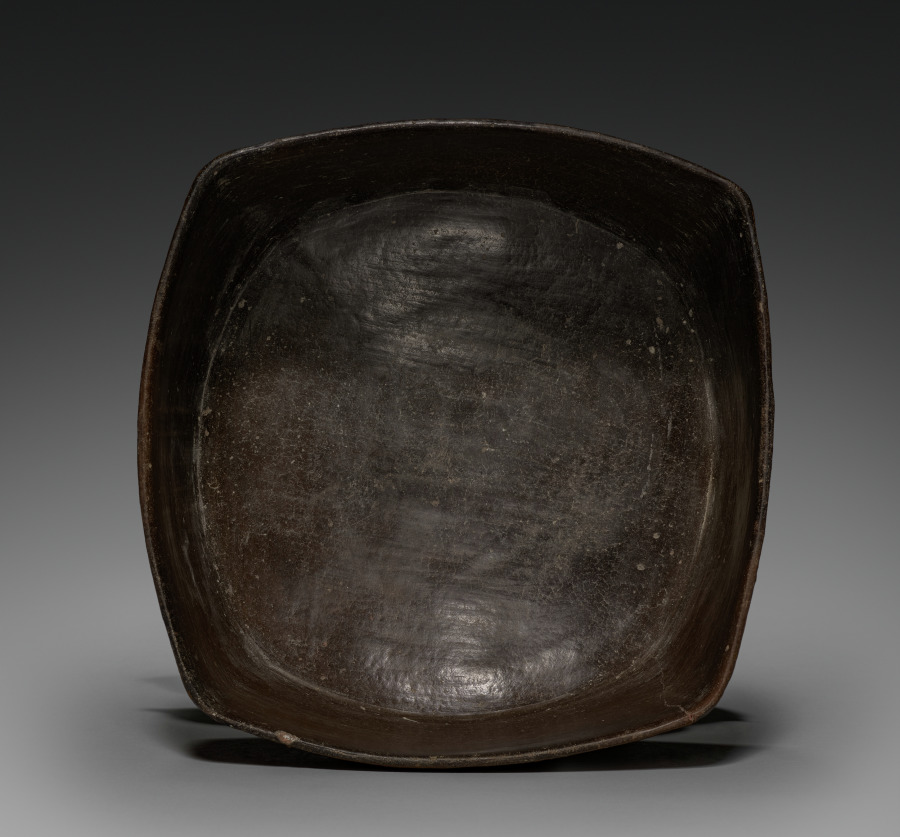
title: Square Bowl with Pampas Cats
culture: Central Andes, South Coast, Paracas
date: 500–400 BCE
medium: Ceramic, post-fire paint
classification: Ceramic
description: The Paracas often decorated their ceramics with geometricized representations of the native Pampas cat, a small, reclusive, wild feline that lives on the margins of agricultural fields, where it preys on the rodents and other pests that are a farmer’s bane. Thus, the ancients seem to have linked it to nature’s fertility and, by extension, human prosperity and continuity.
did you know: The animal shown on this bowl is the Pampas cat, a small, wild feline.